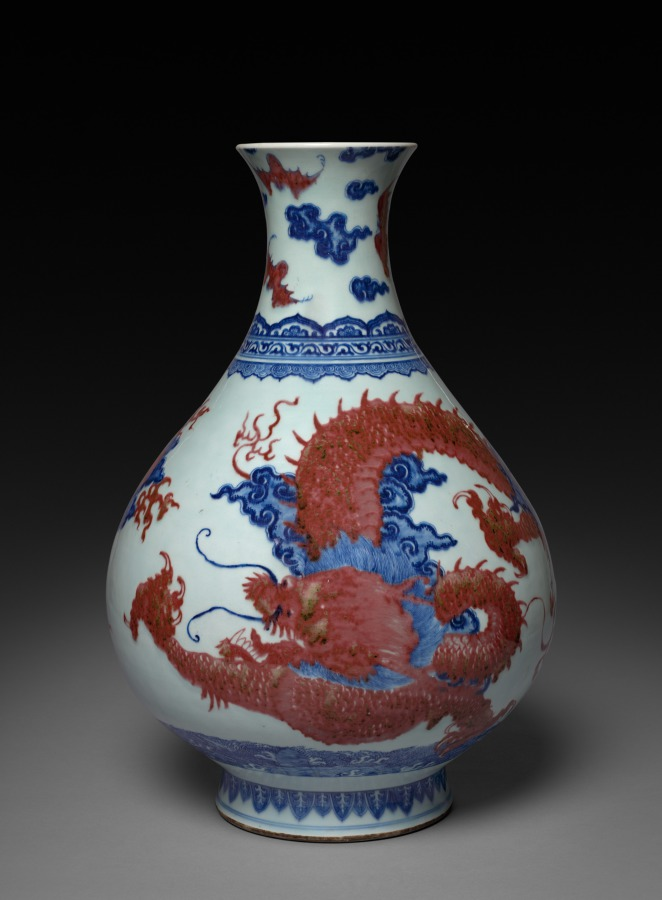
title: Vase with Dragon and Cloud Decoration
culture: China, Qing dynasty (1644-1911), Yongzheng reign (1723-35)–Qianlong reign (1736-95)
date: mid- to late 1700s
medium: porcelain with underglaze blue and red decoration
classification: Ceramic